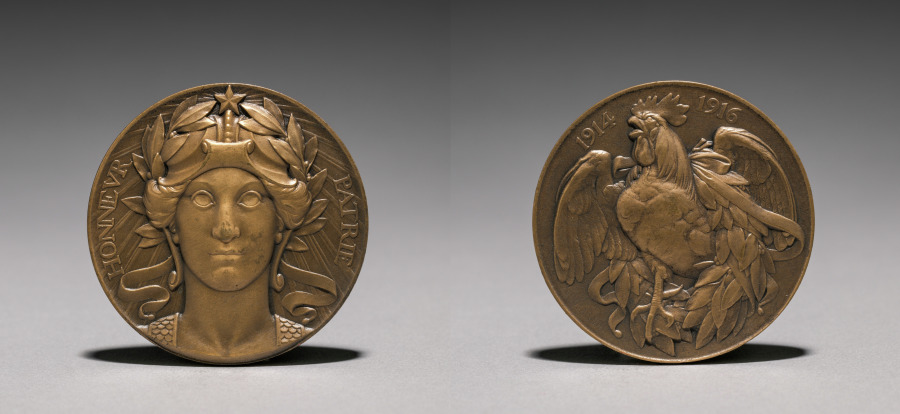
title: Medal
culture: France, 20th century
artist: Auguste Dujardin (French, 1847–1918)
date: 1914–1916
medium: bronze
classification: Metalwork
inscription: "Honneur Patrie."